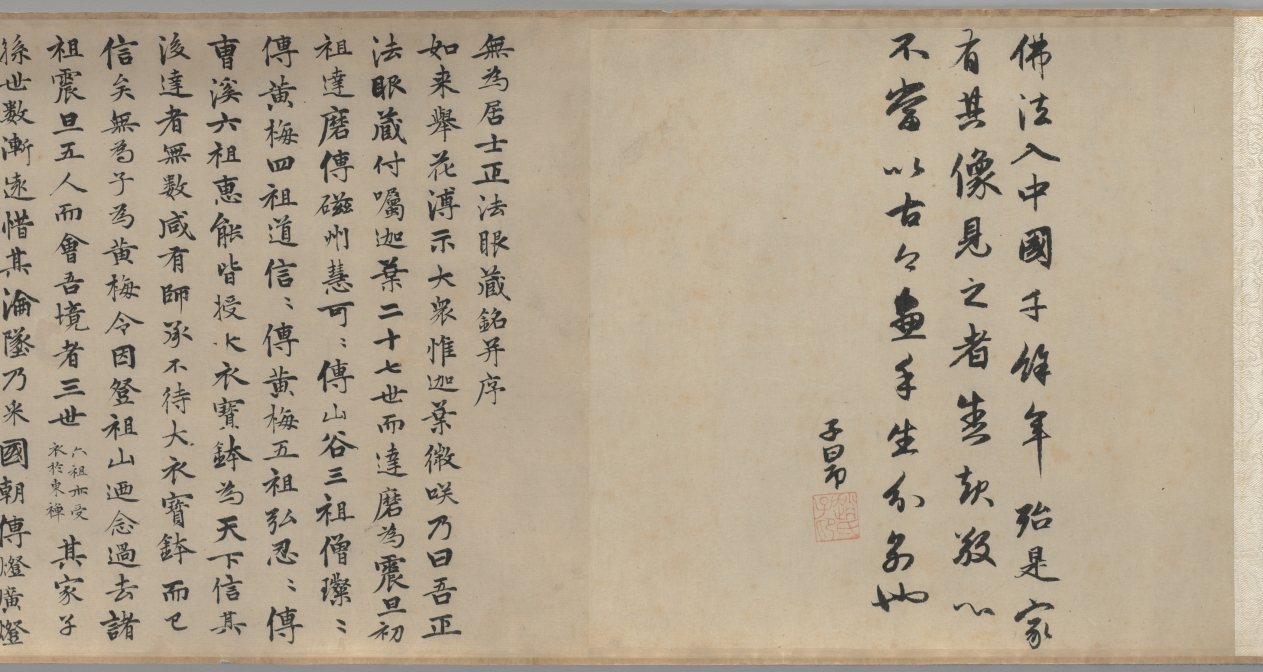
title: Barbarian Royalty Worshiping the Buddha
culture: China, Northern Song dynasty (960-1127)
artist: attributed to Zhao Guangfu (Chinese, c. 923–976)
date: 900s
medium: Handscroll; ink and color on silk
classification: Painting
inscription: 佛法入中國千餘年。殆是家有其像。見之者悉起敬心，不當以古今畫手分別也。 子昂 [印]趙氏子昂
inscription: Colophon by Guo Bi (1280–1335): A transcription of "Zheng fa yan zang ming bing xu" 正法眼藏銘幷序 by Wuwei Jushi 無為居士. Signature: Situi Jushi Guo Bi 思退居士郭畀. 2 seals.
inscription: Spurious artist's signature: Zhao Guangfu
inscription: 1 seal of the Li family (Yuan Dynasty)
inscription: 14 seals of Qianlong Emperor (r. 1736–95)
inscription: 1 seal of Jiaqing Emperor (r. 1796–1820)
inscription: 1 seal of Xuantong Emperor (r. 1909–11)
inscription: 1 official seal of the Yuan dynasty, “Tian li zhi bao 天曆之寶” (Treasure of Tianli).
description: This painting begins on the right with 15 people following a dignified figure wearing headgear with twin pheasant feathers. He extends an incense burner toward the Buddha, who is seated on his lotus throne and flanked by two haloed disciples and two Heavenly Kings. The worshipers’ diverse physical features, regional finery, and religious affiliations suggest the universal appeal of Buddhism. The imagery was inspired by the foreign envoys who frequently came to the Chinese court to give tribute to the emperor. At the time, all outsiders were considered “barbarians,” so their presence was seen as acknowledgment of China’s political and cultural power.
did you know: Sixteen "barbarians" pay homage to the Buddha, who is seated on a lotus throne with two disciples and two guardians.